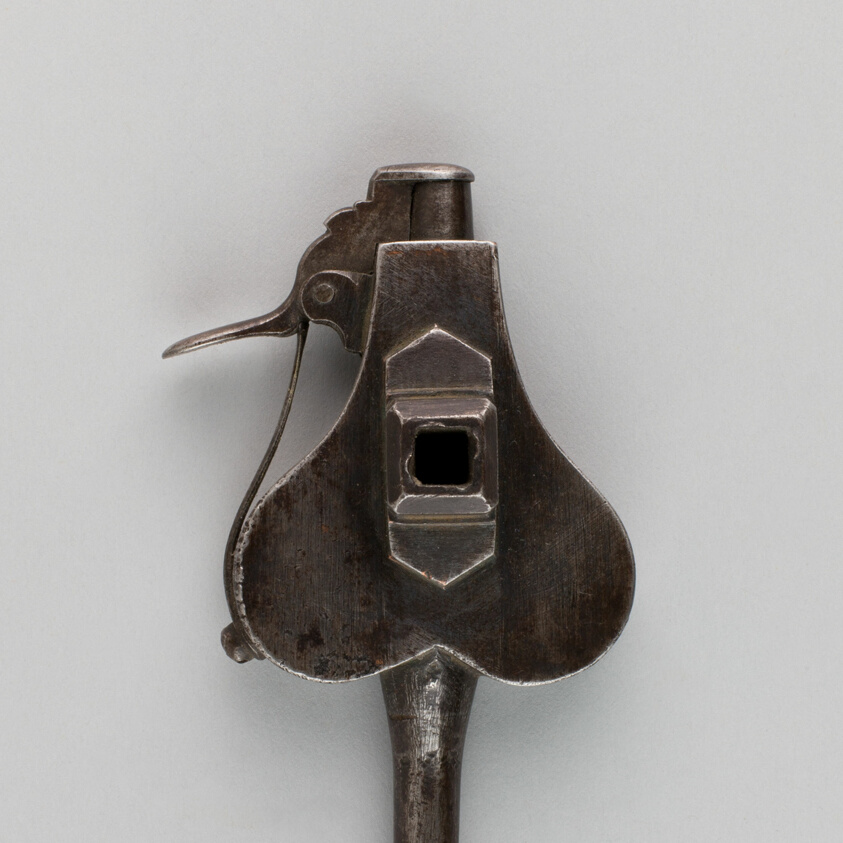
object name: Arms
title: Combination Primer-Spanner-Ramrod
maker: German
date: 1600/20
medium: Steel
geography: Germany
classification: firearm-accessory; arms; arms and armor